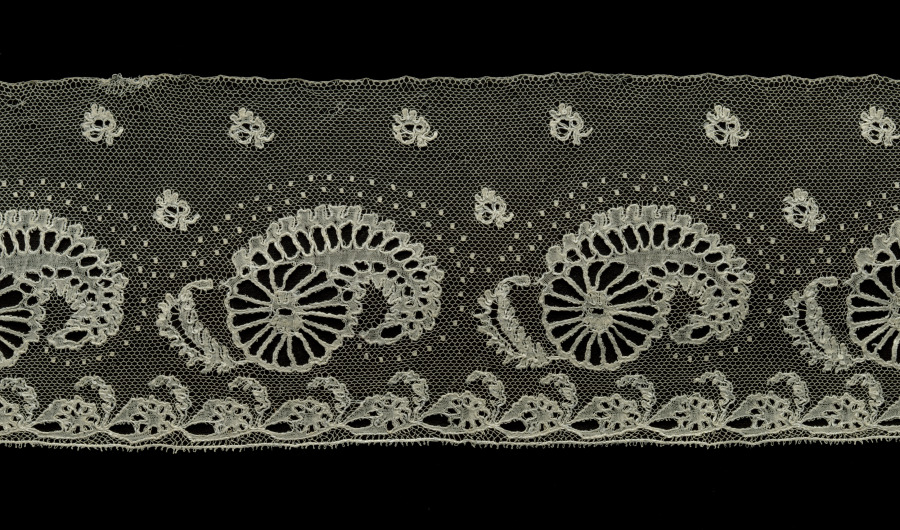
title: Lace Edging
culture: England, Bedfordshire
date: 1800–1820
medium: Silk: bobbin lace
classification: Lace